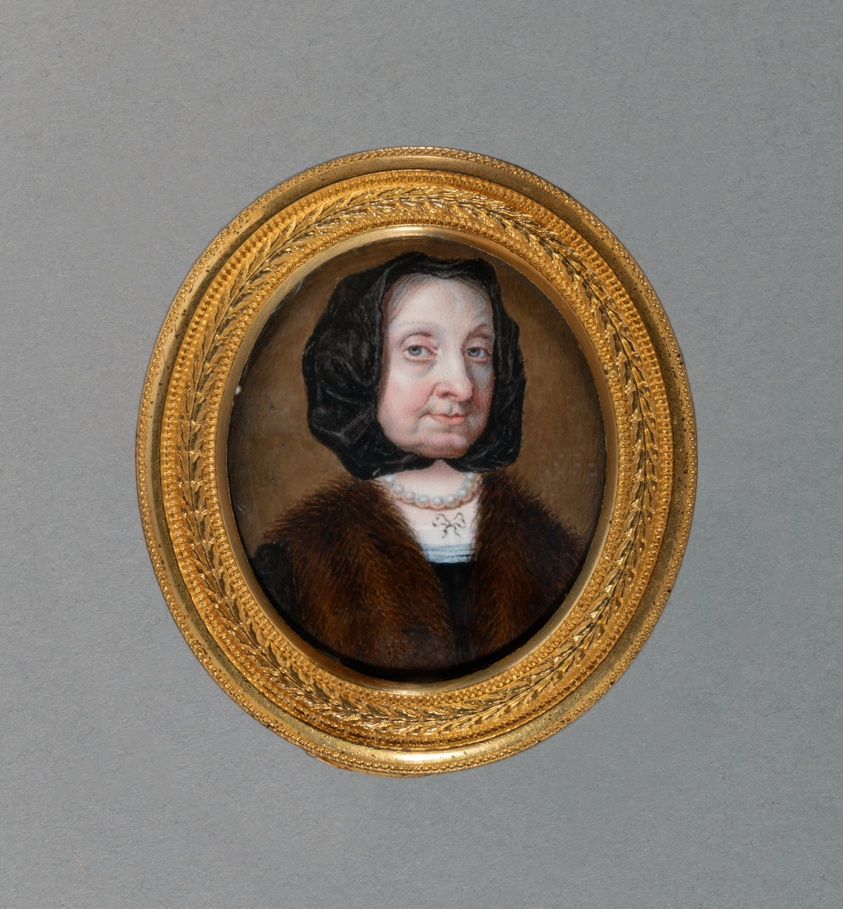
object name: Miniature Painting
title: Portrait of Elizabeth Cromwell, Daughter of Oliver Cromwell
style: 17th Century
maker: Paul Prieur (Swiss, c. 1620–1683)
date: c. 1650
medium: Enamel on gold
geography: Switzerland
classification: miniature painting; european decorative arts; european painting; miniature; portrait; portrait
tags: portrait, woman, portraits, black (color), bows, brown (color), elderly, jewelry, necklace, pearls, portraits: female subject, white (color)